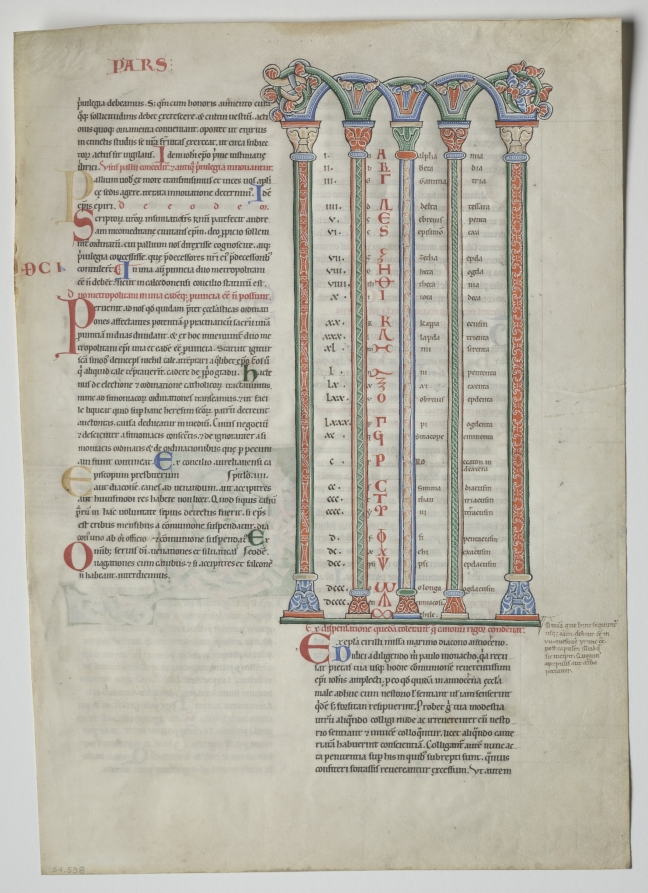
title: Single Leaf from a Decretum by Gratian: Quadruple Arcade with Concordance of Greek and Latin Alphabets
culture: France, Burgundy, Archdiocese of Sens, Abbey of Pontigny, 12th century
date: c. 1160–1165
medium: ink and tempera on vellum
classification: Manuscript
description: This leaf was excised from a copy of the handbook of church law known as the Decretum written by Gratian, an Italian Camaldolese monk active in Bologna from about 1130 to 1140. The style of the illumination and the script date the leaf to between 1160 and 1165. In November 1164, Thomas Becket, Archbishop of Canterbury, took refuge at Pontigny as a result of his conflict with King Henry II of England. During his stay, Becket immersed himself in the study of church law, as evidenced by his later use of citations from the Decretum. This leaf could have been part of the original manuscript Becket consulted. The volume was later dismembered following the suppression of the monastery during the French Revolution in the late 1700s.